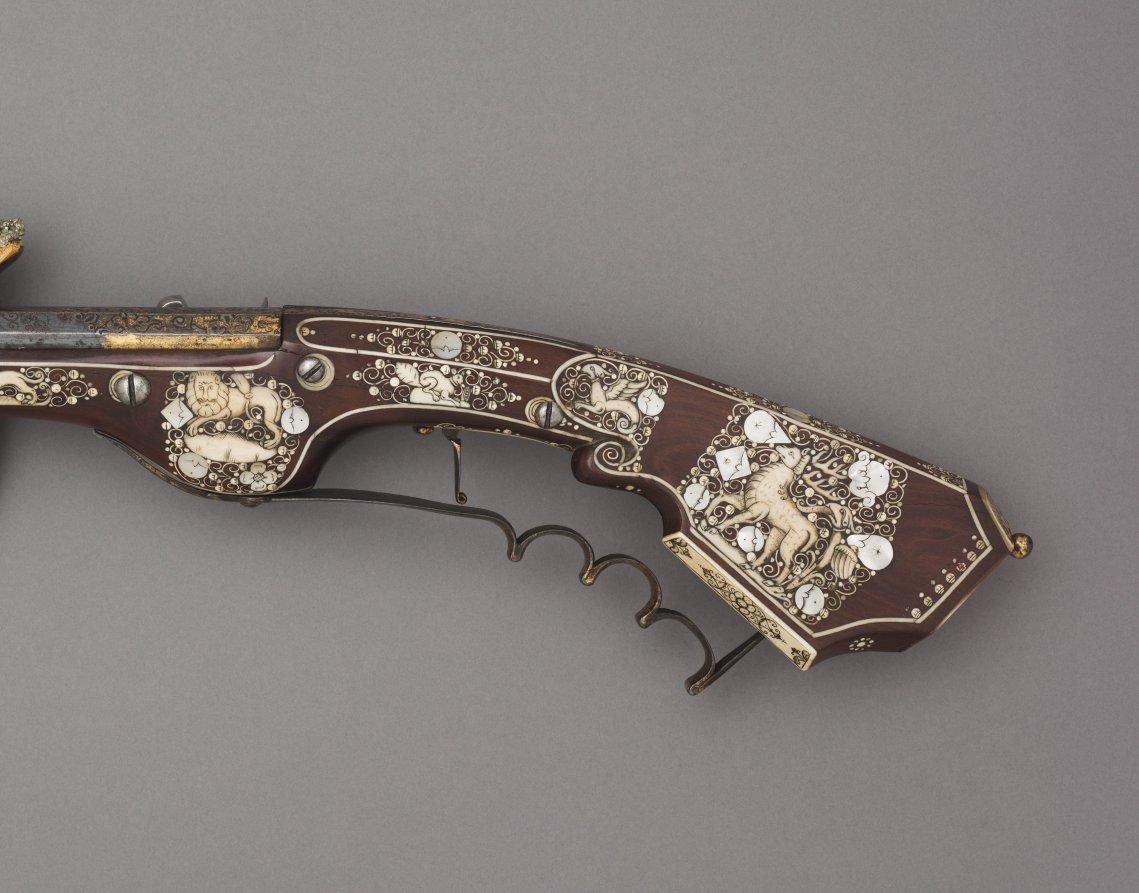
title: Wheel-lock Petronel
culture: Silesia (Southwestern Poland), Teschen, 17th century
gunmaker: Georg Kurland (Polish)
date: c. 1630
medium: steel, gilding, and wood inlaid with elk horn, ivory, and mother-of-pearl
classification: Arms and Armor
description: A petronel was a type of long pistol made with a wheel-lock ignition. Despite its length, the petronel was fired at the wrist like a pistol and not at the shoulder like a rifle. They were generally made in pairs during the early 1600s. Civilian versions were elaborately decorated for aristocratic clients.